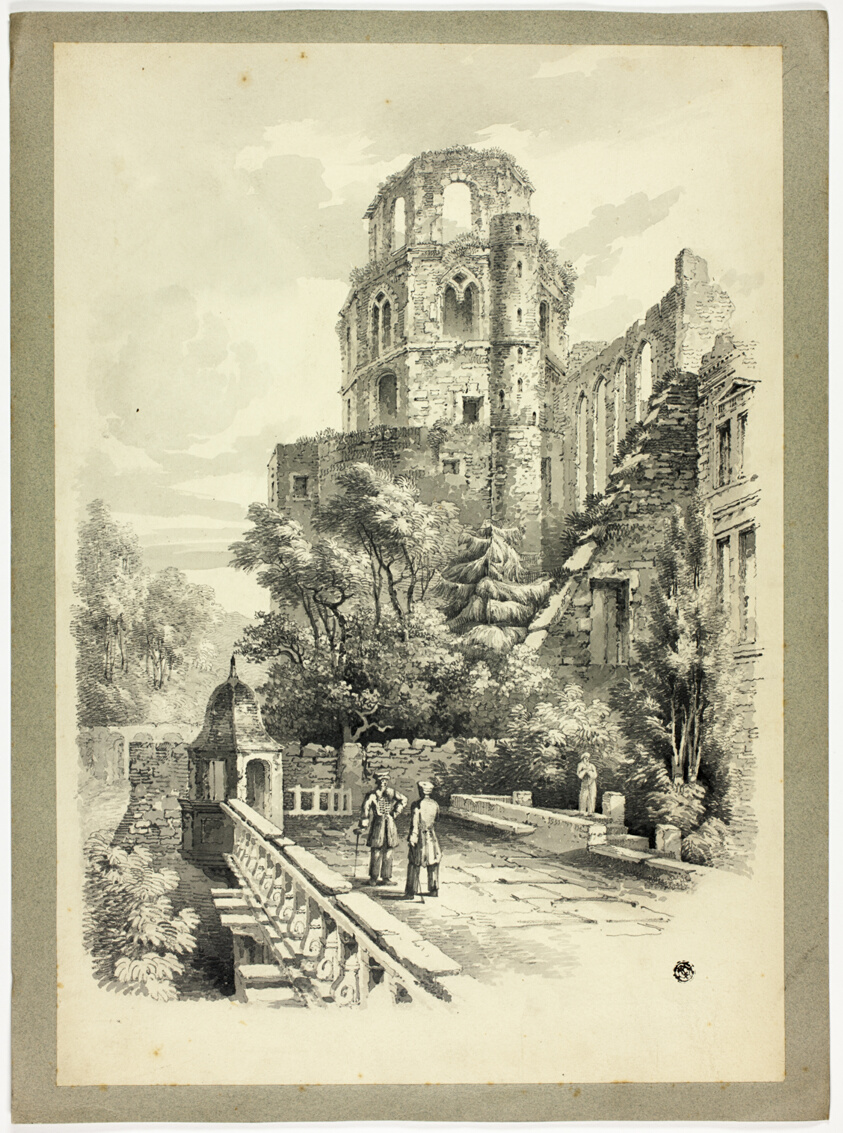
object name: Drawing and Watercolor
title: Heidelberg Castle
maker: Style of Samuel Prout; English, 1783-1852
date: c. 1830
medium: Brush and black ink and gray wash, over graphite, on cream wove paper, laid down on blue covered wove card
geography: United Kingdom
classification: drawings (visual works); paper; prints and drawing; brush and wash; brush and ink